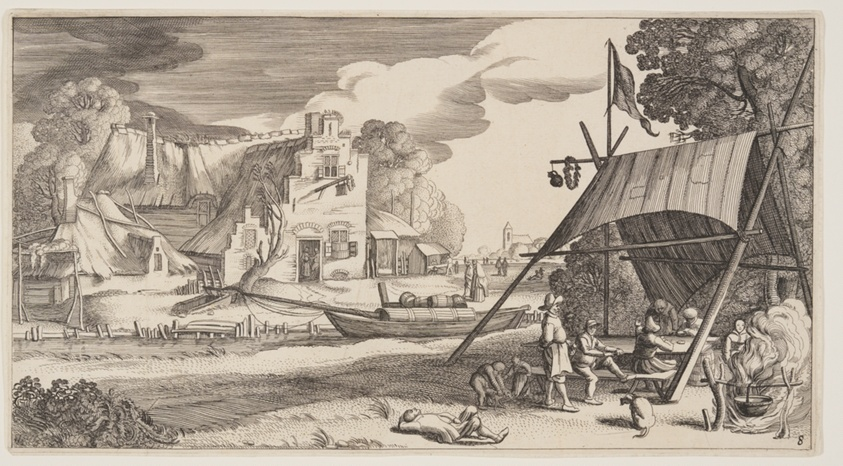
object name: Print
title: Tent with Country People, from Landscapes (Playsante Lantschappen)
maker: Attributed to Claes Jansz. Visscher II (Dutch, 1586-1652); after Jan van de Velde II (Dutch, c. 1593-1641)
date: c. 1641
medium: Etching, with engraving, on ivory laid paper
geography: Netherlands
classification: etching; paper; print; prints and drawing